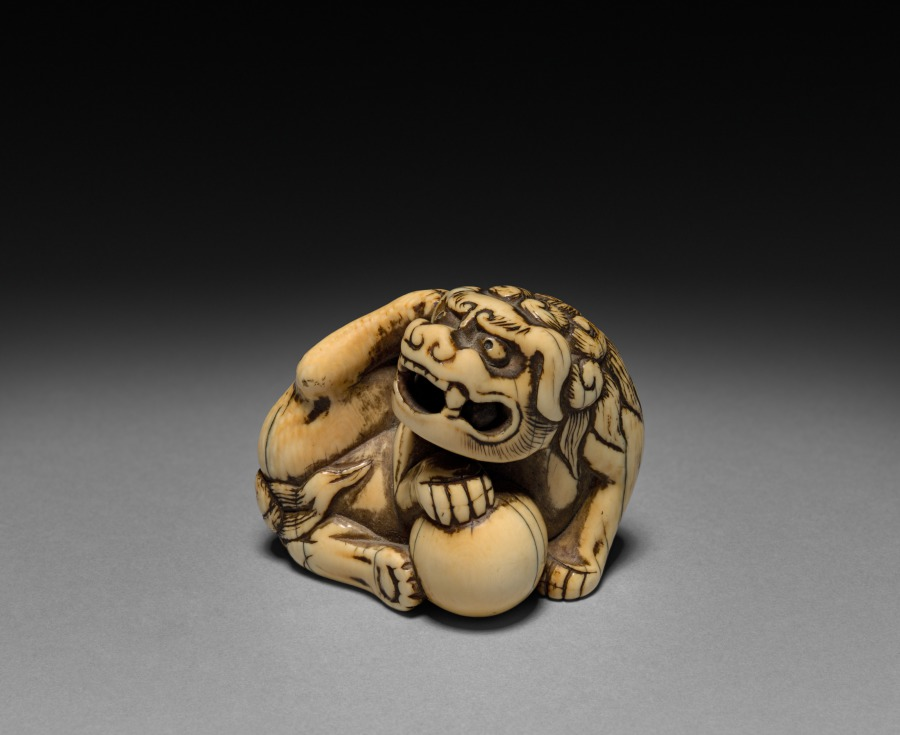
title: Chinese Lion with Ball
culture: Japan, Meiji period (1868–1912)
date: early 1900s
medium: ivory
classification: Netsuke